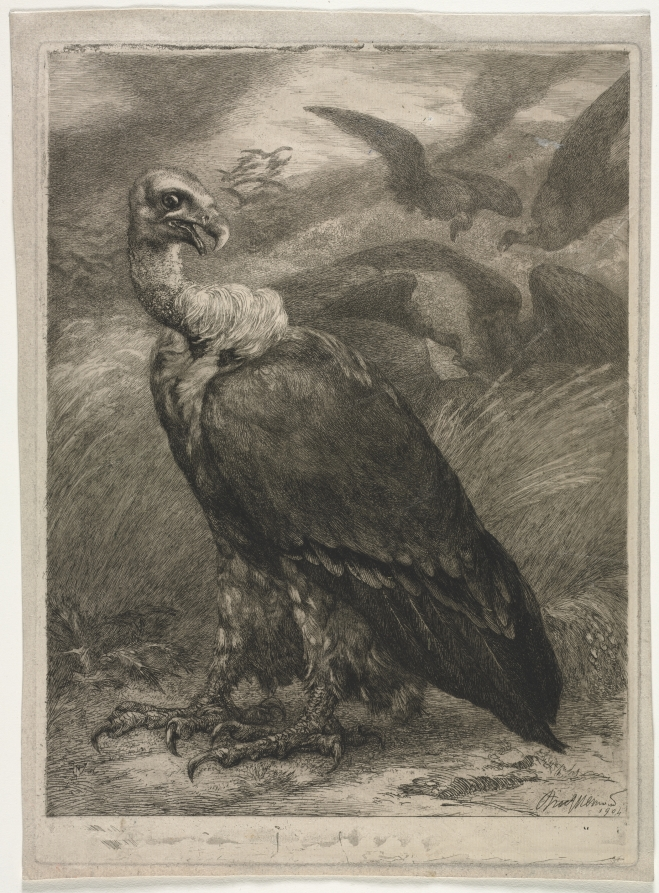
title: Vulture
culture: France, early 20th Century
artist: Félix Bracquemond (French, 1833–1914)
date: 1904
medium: etching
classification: Print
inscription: signed and dated, lower right, in plate: Bracquemond 1904